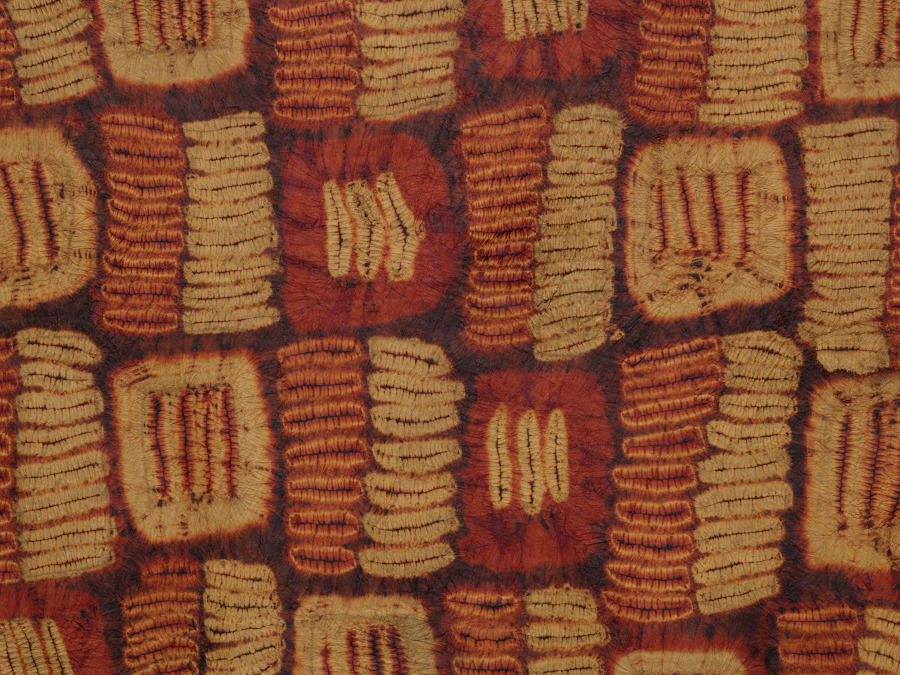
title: Man's Garment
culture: Africa, West Africa, Côte d'Ivoire, Dida-style weavers and dyers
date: possibly early 1900s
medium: Raffia palm fiber (Raphia ruffia or R. vinifera) and dye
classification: Textile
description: Displayed flat to highlight its designs and preserve its delicate fibers, this wrapper was meant to drape around the body. An elite man wore it with one corner over a shoulder, the knotted fringe skimming his ankles. The garment gained its earth-toned geometric patterns through plangi, a knot-and-twist resist dyeing technique; each color is applied in a different dye bath, from lightest to darkest. While their patterns are unique, these garments reflect regional influence: Dida women likely learned hand interlacing from Liberian Kpelle weavers. Such garments were given as gifts or worn on special occasions, at least into the 1990s.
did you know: The tying of fabric during the making of this garment gives its surface a distinctively "crinkled" texture.